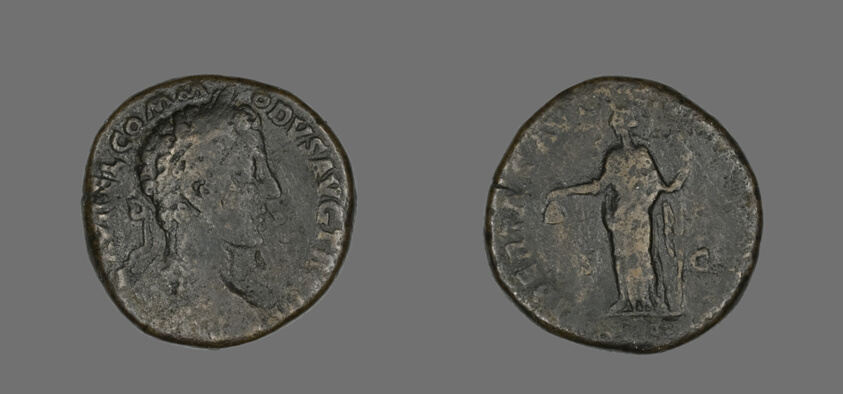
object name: Coin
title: Sestertius (Coin) Portraying Emperor Commodus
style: roman (ancient, style or period)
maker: Roman, minted in Rome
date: December 177-December 178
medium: Bronze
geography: Roman Empire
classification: coin; ancient art